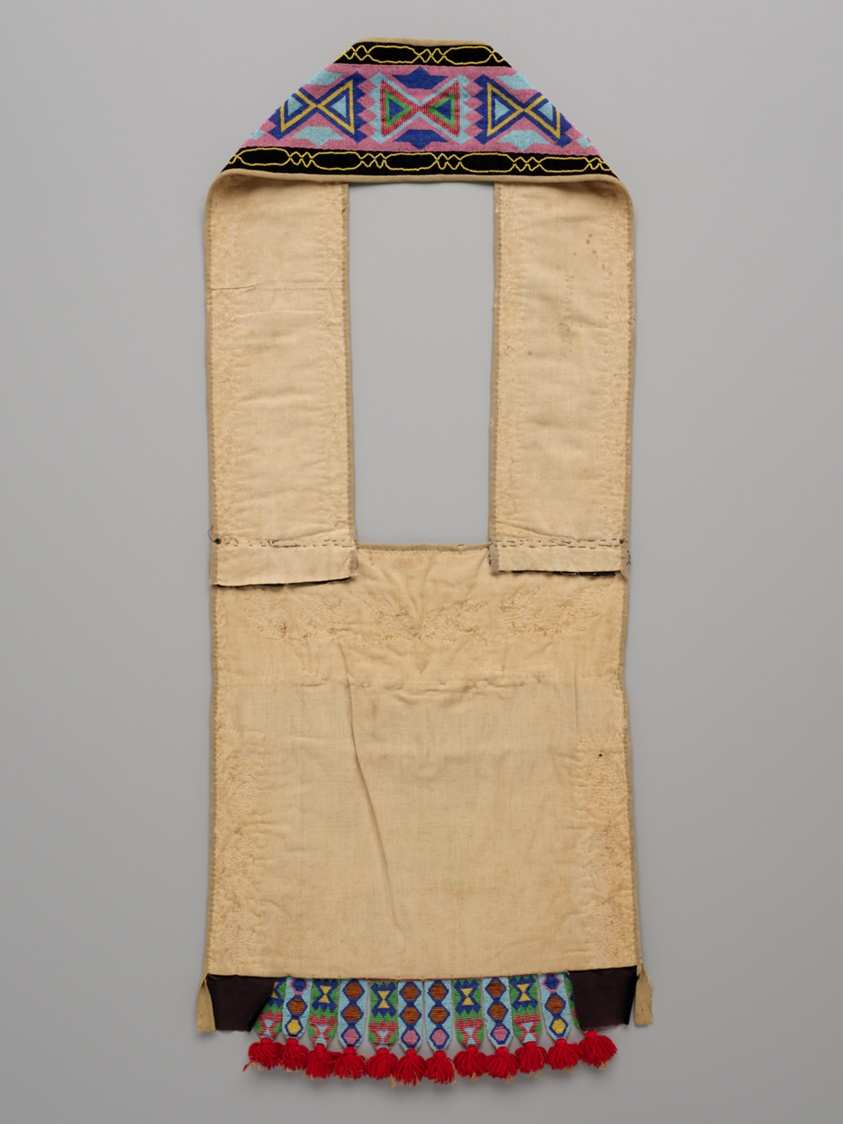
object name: Costume and Accessories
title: Man's Shoulder Bag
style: potawatomi, native american, americas, Arts of the Americas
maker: Maker unknown (Potawatomi); Great Lakes region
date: Mid–late 19th century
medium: Cotton, velvet, yarn, and glass seed beads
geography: Great Lakes Region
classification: beadwork; costume accessory; costume; art of the americas